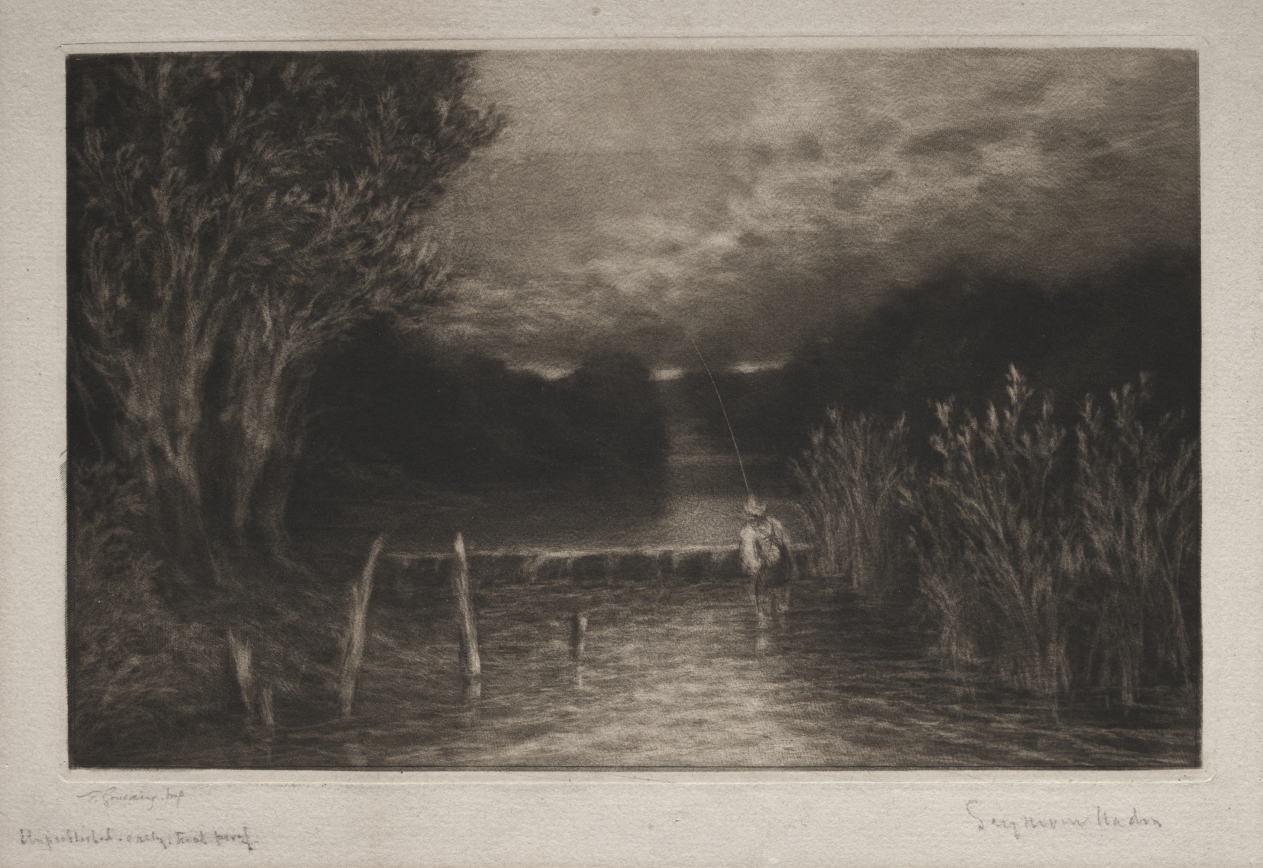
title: Grayling Fishing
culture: England, 19th century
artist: Francis Seymour Haden (British, 1818–1910)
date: 1897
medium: mezzotint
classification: Print